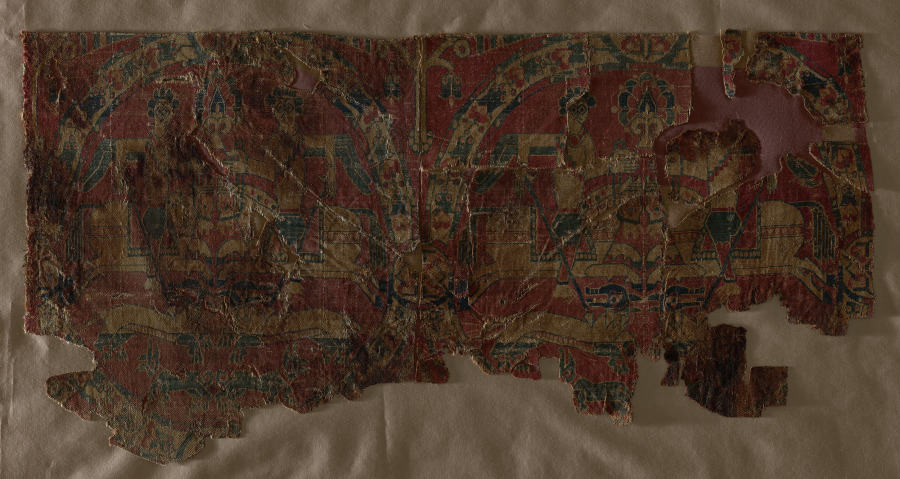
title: Roundels with Hunters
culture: Eastern Iran or Central Asia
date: 800s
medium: Silk: samite weave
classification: Textile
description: This textile consists of two fragments mounted together. They are woven with floral roundels that enclose horsemen hunting lions. The theme of riders hunting with lances, the floral frames of the roundels, and the costumes of the hunters were all inspired by silks from the Byzantine world. The stiff, abstracted style, however, is characteristic of Sogdian silks, woven in Sogdiana in Central Asia and often traded to distant markets. These fragments were preserved in a grave in Egypt where they were found sewn as ornaments onto a tunic.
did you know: This textile consists of two fragments mounted together (CMA 1982.284 and CMA 1959.124).